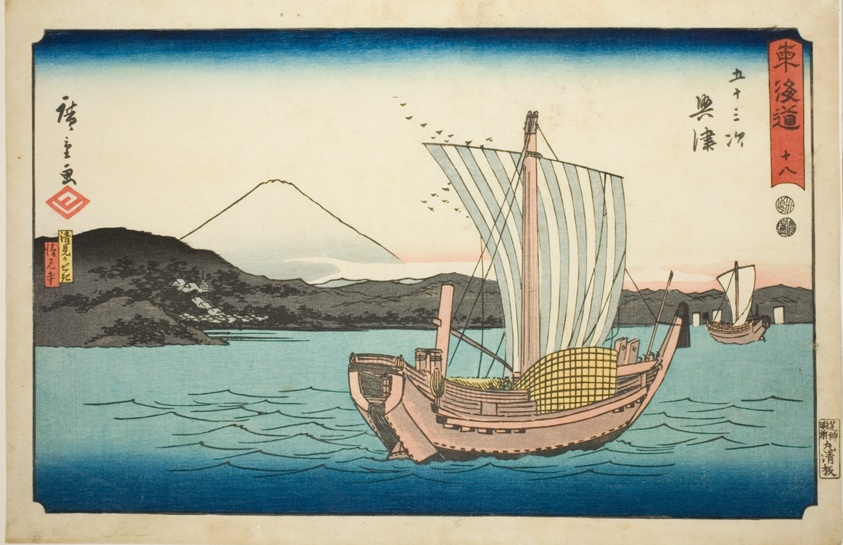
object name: Print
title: Okitsu: Kiyomigaseki and Seiken Temple (Kiyomigaseki, Seikenji)—No. 18, from the series "Fifty-three Stations of the Tokaido (Tokaido gojusan tsugi)," also known as the Reisho Tokaido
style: Japanese (culture or style)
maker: Utagawa Hiroshige 歌川 広重; Japanese, 1797-1858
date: c. 1847/52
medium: Color woodblock print; oban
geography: Japan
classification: woodblock print; print; asian art